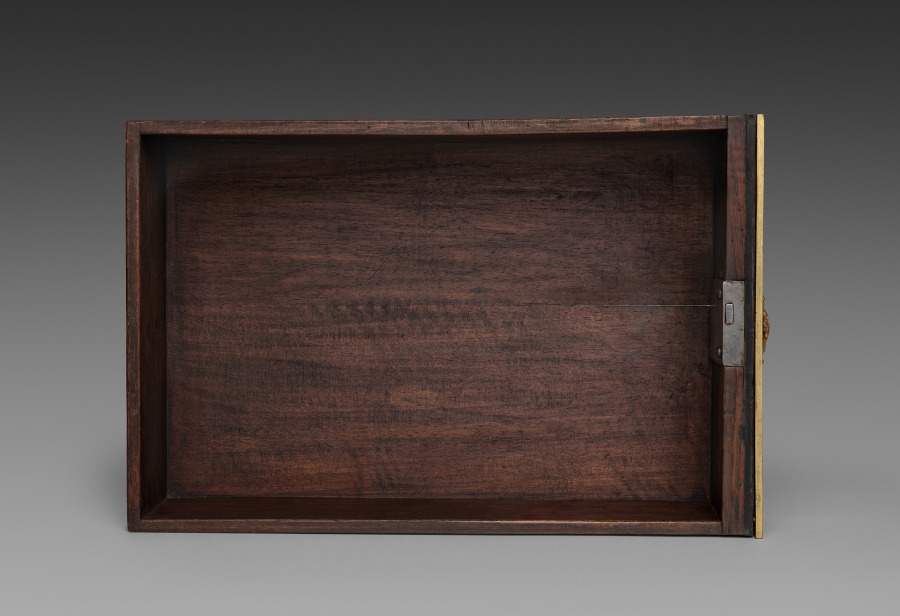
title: Side Drawer for Cabinet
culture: France, late 17th Century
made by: André-Charles Boulle (French, 1642–1732)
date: c. 1690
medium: ebony, marquetry in metal and tortoise shell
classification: Furniture and woodwork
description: Appointed cabinetmaker to King Louis XIV in 1672, André-Charles Boulle became a master of furniture making in France during the late 1600s until his death in 1732. Known primarily for his use of marquetry, in which metal patterns are inlaid into tortoiseshell then applied within the veneered surface of the furniture, Boulle established a level of quality and craftsmanship few others could achieve. As a result, his work found favor at the royal court and among other aristocrats and diplomats eager to impress the king. The inclusion of a medallion depicting Louis XIV within the bronze decoration of this chest would have identified the owner with the royal court. Often exhibiting stout architectural proportions with elegant groups of inlaid motifs such as the parrot on the central panel of this chest, Boulle’s designs are an example of the intellectual fashion for contrasting ideas, materials, and motifs.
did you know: Originally designed to sit atop an elaborate tall stand, this chest was likely altered in the late 1700s to reduce its scale and height.